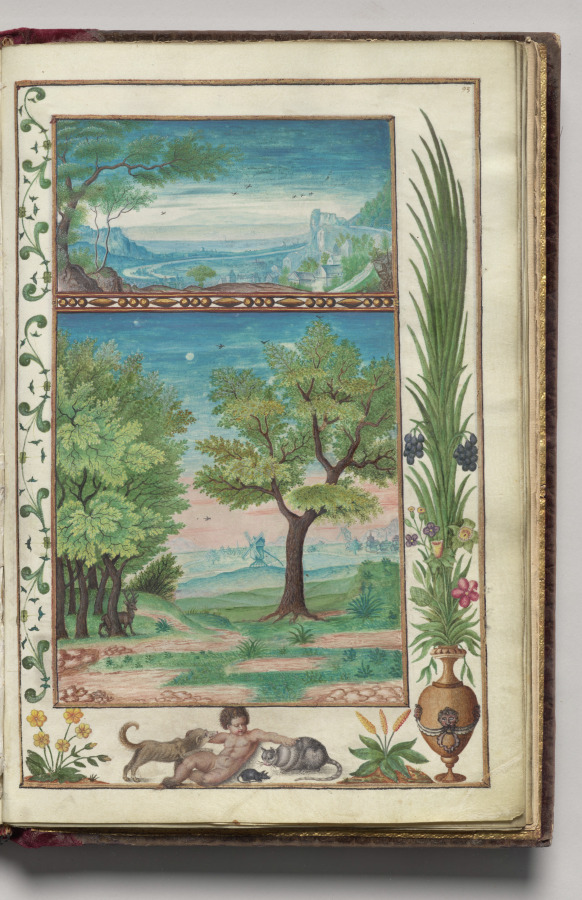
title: Two Landscapes with Dog, Putti, Rat, Cat, and Urn Border, folio 41 (recto), from Florilegium (A Book of Flower Studies)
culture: France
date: 1608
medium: watercolor, ink, silver, and gold over occasional traces of pencil, on vellum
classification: Bound Volume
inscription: Dated: Poitiers 1608 (on frontispiece) Signed: On frontispiece in black ink, lower right: Van Kuyk Notation on drawing: Frontispiece: in pencil, lower margin: * élève de Van Kessel, peintre flammand (* in pencil also appears in front of Van Kuyk's name).